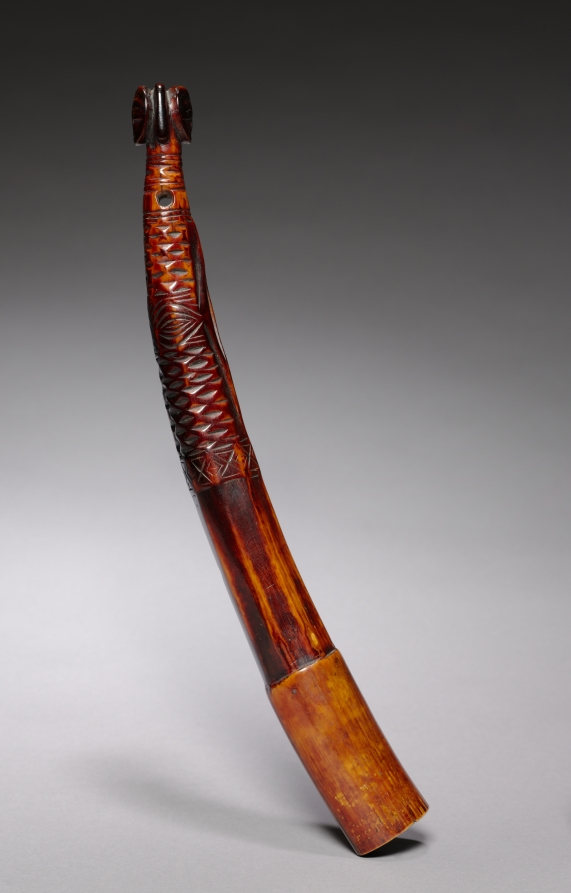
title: Side-Blown Trumpet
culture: Equatorial Africa, Cameroon; Fang, 19th century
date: late 1800s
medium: Elephant ivory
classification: Musical Instrument